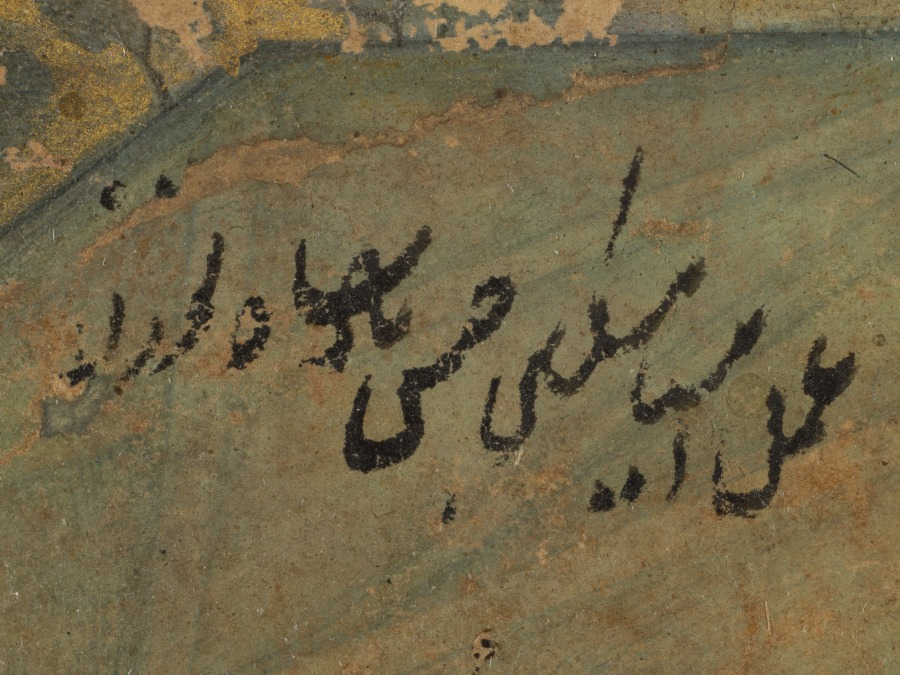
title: An Ambassador before Humayun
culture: Mughal India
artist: attributed to Miskin (Indian, active 1570s–c. 1604)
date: c. 1610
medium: Gum tempera and gold on paper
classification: Painting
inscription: Persian inscription at upper left probably added c. 1700s, in nasta‘liq script: the work of the master Miskin / Great King Hasan . . .]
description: Humayun, the second Mughal emperor of India, son of Babur and father of Akbar, is enthroned in an outdoor royal encampment. The scene recalls Humayun’s 15 years of exile between 1540 and 1555, many of which he spent traveling through Pakistan, Afghanistan, and Iran, after an Afghan rebel ousted him from India.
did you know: Humayun wore a special type of turban, his Taj-i Izzat (Crown of Power and Glory).